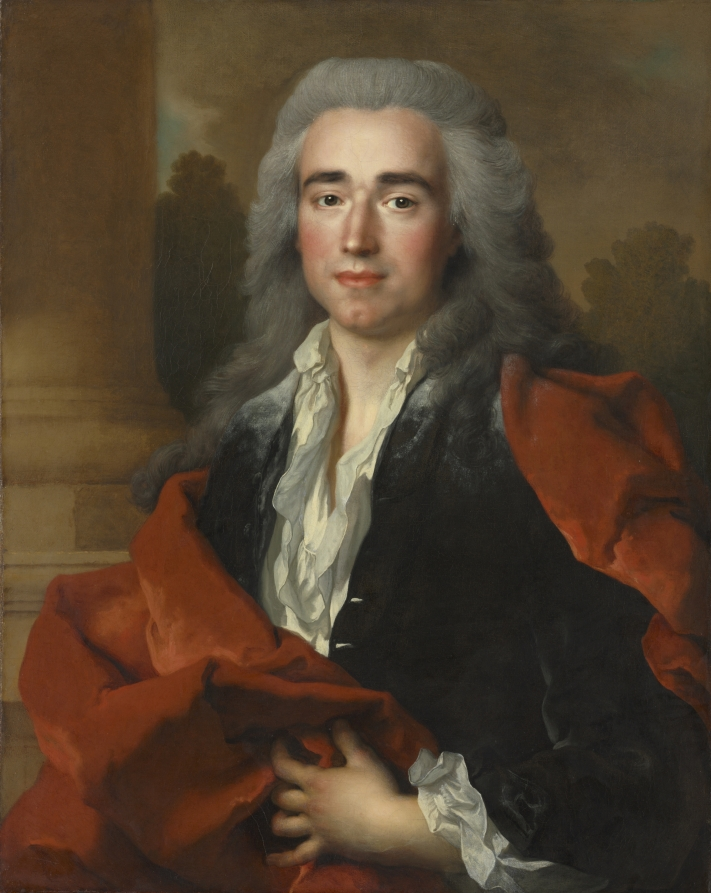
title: Portrait of Anne Louis Goislard de Montsabert, Comte de Richbourg-le-Toureil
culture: France, 18th century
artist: Nicolas de Largillière (French, 1656–1746)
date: 1734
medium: oil on canvas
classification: Painting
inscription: signed on back of original canvas: peint par / N. de Largillierre / 1734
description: By positioning the figure close to the picture plane and engulfed in a swirl of drapery, Nicolas de Largillière created a remarkably informal likeness of the 26-year-old Goislard. This impression is enhanced by the sitter’s open shirt and the drift of wig powder that dusts the shoulders of his velvet doublet. Warm hues and thick brushstrokes reveal the artist’s study of earlier Flemish painters, notably Anthony van Dyck. Despite his youth and seeming nonchalance, Goislard was a figure of prominence. He may have commissioned this work to commemorate his appointment to the Parlement, or governing council, of France in 1732, or earning the title Lord of Montsabert the following year.